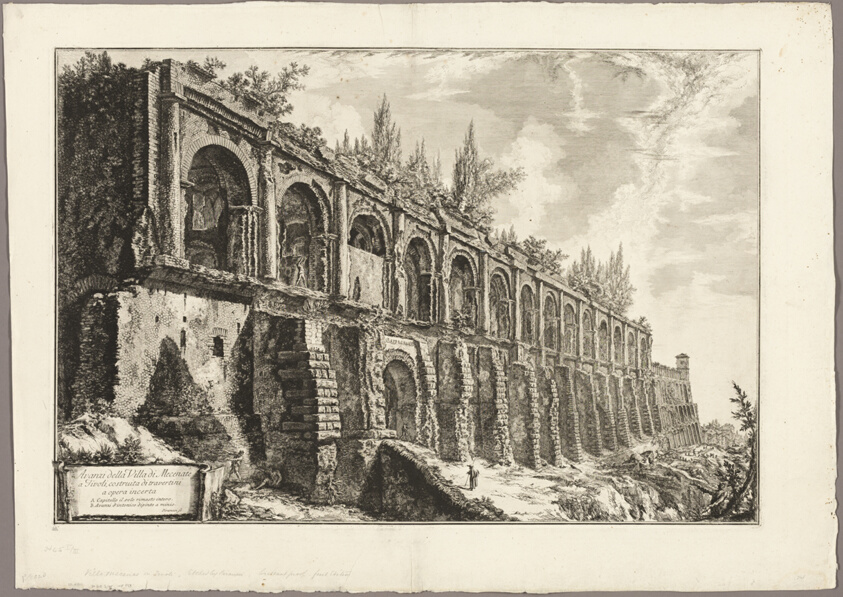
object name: Print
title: Remains of the Villa of Maecenas at Tivoli, from Views of Rome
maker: Giovanni Battista Piranesi (Italian, 1720-1778); published by Francesco (Italian, 1758-1810) and Pietro Piranesi (Italian, born 1758/9)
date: 1763, published 1800–07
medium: Etching on heavy ivory laid paper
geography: Italy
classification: etching; print; prints and drawing